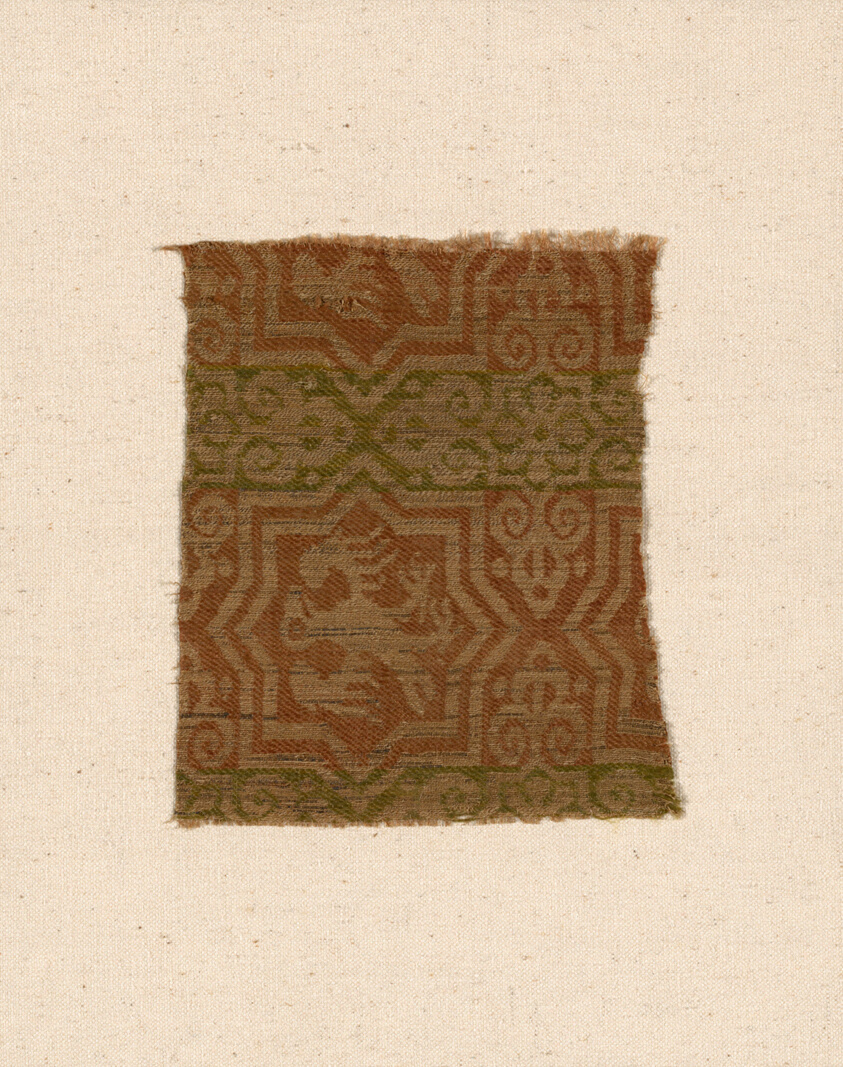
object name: Textile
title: Fragment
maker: Spain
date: 13th century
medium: Silk and gilt-animal-substrate-wrapped linen, complementary weft twill weave with inner warps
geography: Italy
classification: textile; weaving